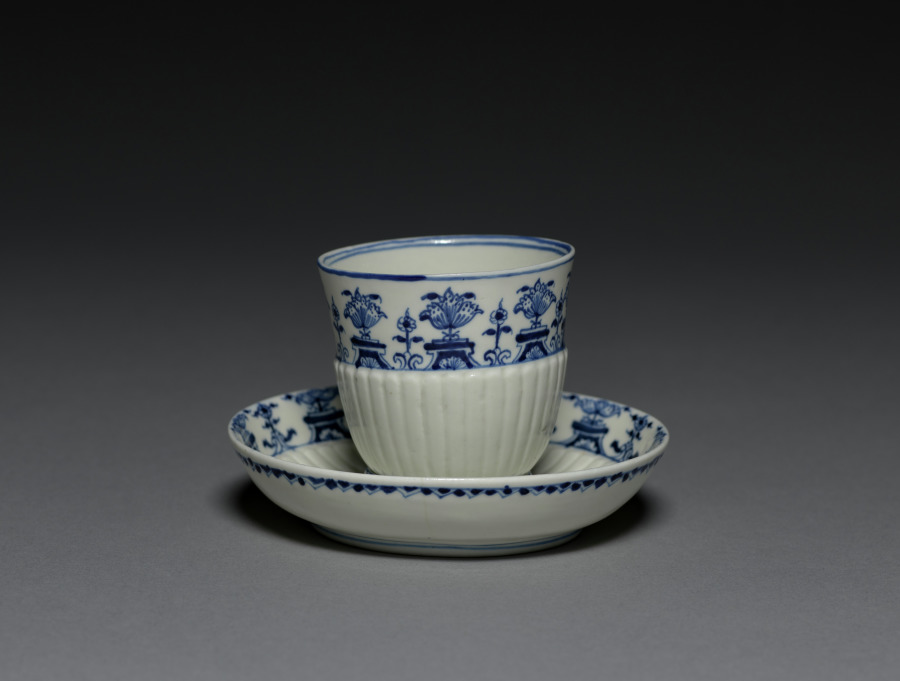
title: Cup and Saucer (tasse et soucoupe)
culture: France, Saint Cloud, 18th century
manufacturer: Saint Cloud Porcelain Factory (French)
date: 1700–1720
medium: soft-paste porcelain with underglaze blue decoration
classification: Ceramic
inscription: [On saucer, in blue, eight-pointed star]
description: The cobalt blue and white decoration that borders the edges of the cup and saucer was one of the earliest types of decoration used at the Saint-Cloud porcelain factory. This type of cup and saucer pair may have been called a trembleuse (trembler) due to the raised ring around the well of the saucer that would have secured the cup in trembling hands.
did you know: The Saint-Cloud Porcelain Factory was the first successful European manufacturer of soft-paste porcelain, a slightly off-white product that attempted to emulate the prized hard-paste porcelain produced by China and Japan.